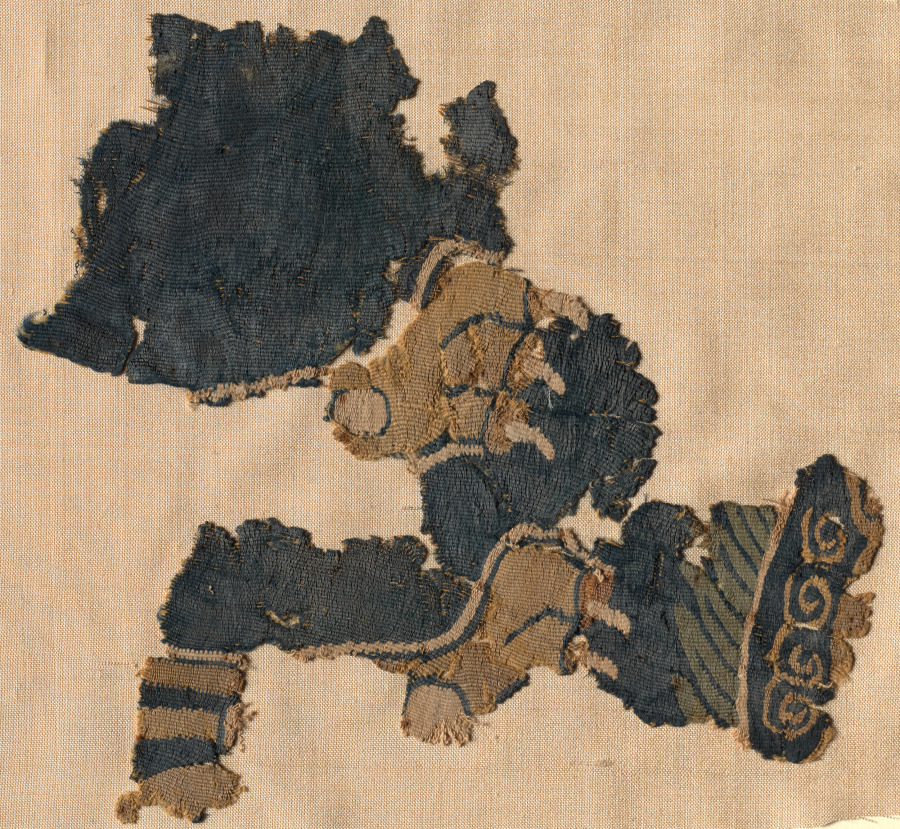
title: Fragment, probably from a large hanging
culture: Iran or Iraq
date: 900s–1000s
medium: Wool: tapestry weave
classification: Textile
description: This fragment preserves the forepaws of what must have been a very large-scale lion. Beneath it is a bit of another motif which can no longer be identified. The ground is a soft grayish-blue, the design pale yellow and white, and the leaflike projections on the lower motif are aqua. The design is oriented in the warp direction. The technique is the usual tapestry weave with slit and dovetail joins. The weave is very fine; the wefts are tightly beaten up. There is limited use of eccentric weaving.